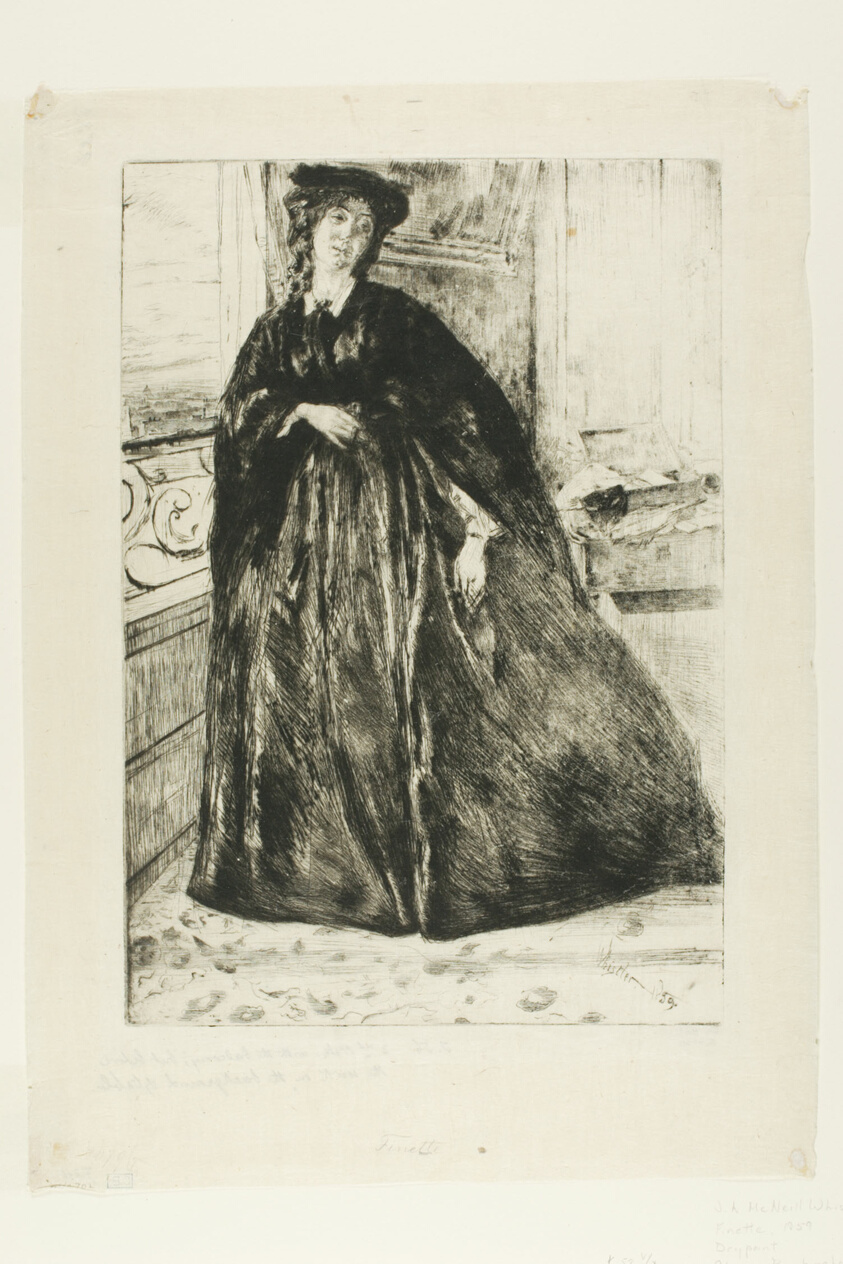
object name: Print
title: Finette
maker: James McNeill Whistler (American, 1834-1903)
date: 1859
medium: Etching and drypoint in black on ivory Japanese paper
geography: United States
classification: etching; foul biting; drypoint; print; prints and drawing; paper